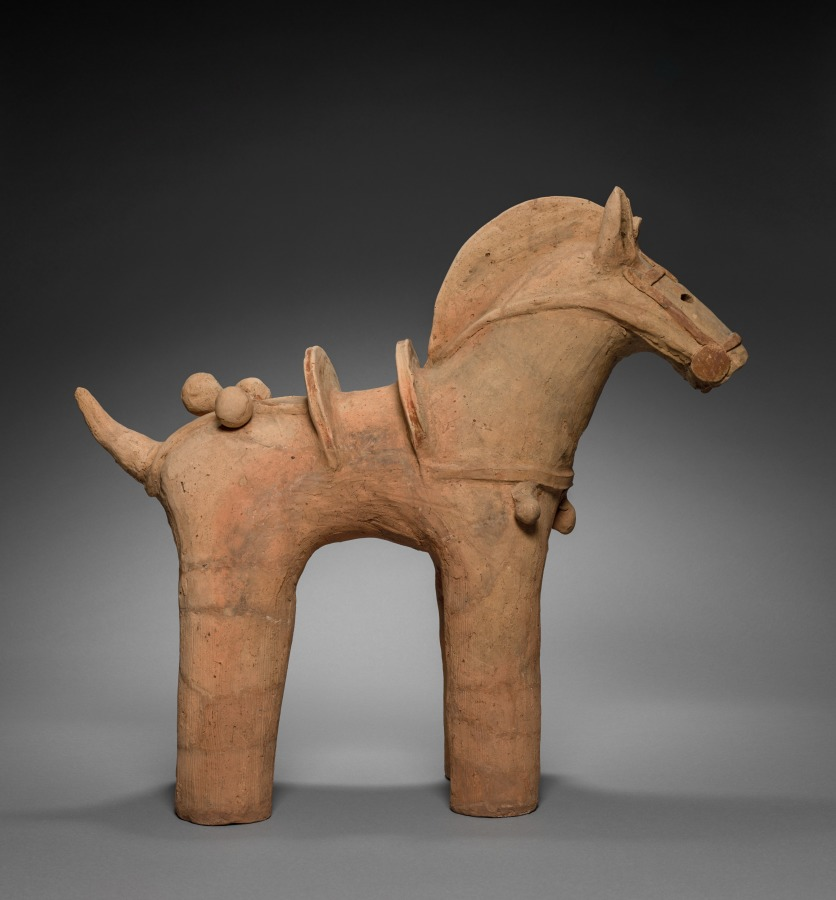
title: Haniwa Horse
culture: Japan, Kofun period (300–710 CE)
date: 400s–500s CE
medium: earthenware with traces of pigment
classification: Sculpture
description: This horse’s tack, with its round bells, resembles saddlery in fashion in Korea during the 400s–500s CE. Concurrent with mass migration from the Korean Peninsula, tombs covered with large earthen mounds similar to those on the Asian continent began to appear in Japan around the year 300 CE. Called “old mounds” (kofun), their surfaces were covered with hollow clay cylinders (haniwa). Sculptures of animals, buildings, and finally human figures followed, developing over the ensuing three centuries.